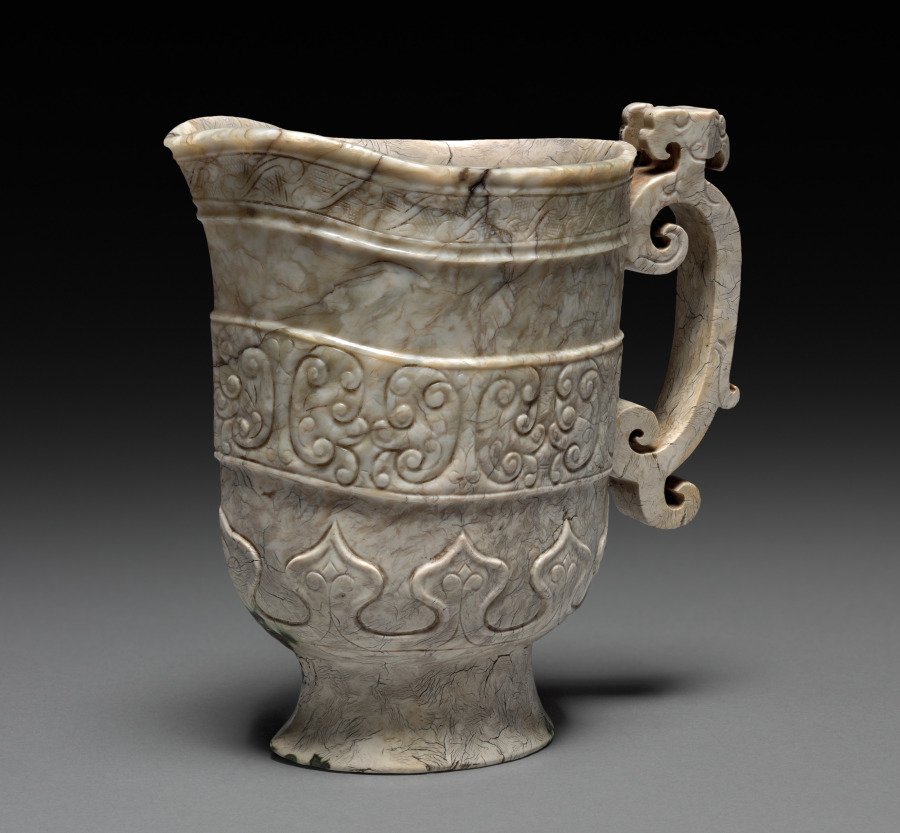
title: Ewer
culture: China, Ming dynasty (1368–1644)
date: 1700s or later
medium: jade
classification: Jade